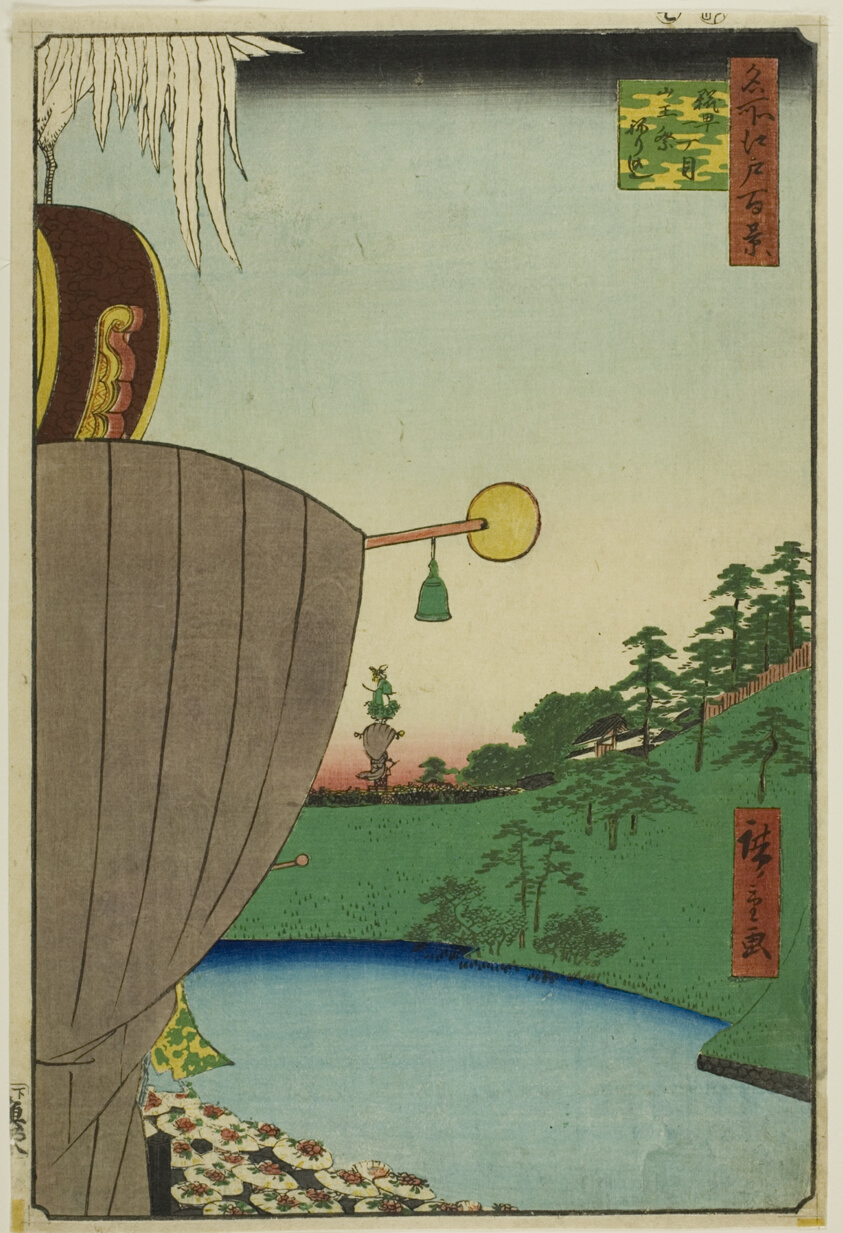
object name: Print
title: Sanno Festival Procession at Kojimachi Itchome (Kojimachi Itchome Sanno Matsuri nerikomi), from the series "One Hundred Famous Views of Edo (Meisho Edo hyakkei)"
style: Japanese (culture or style)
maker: Utagawa Hiroshige 歌川 広重; Japanese, 1797–1858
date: 1856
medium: Color woodblock print; oban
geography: Japan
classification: woodblock print; print